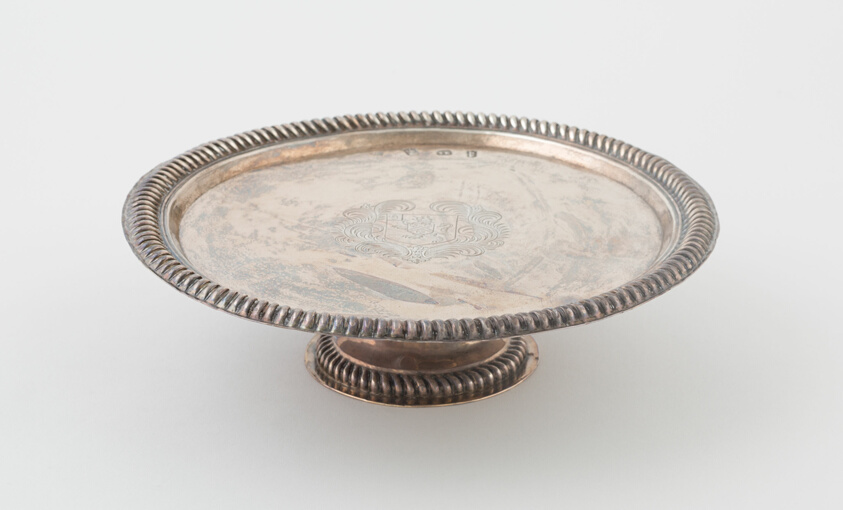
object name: Metalwork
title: Tazza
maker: Possibly Thomas Ash; English, active 1697; London, England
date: 1697/98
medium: Silver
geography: London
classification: silver; metalwork; european decorative arts